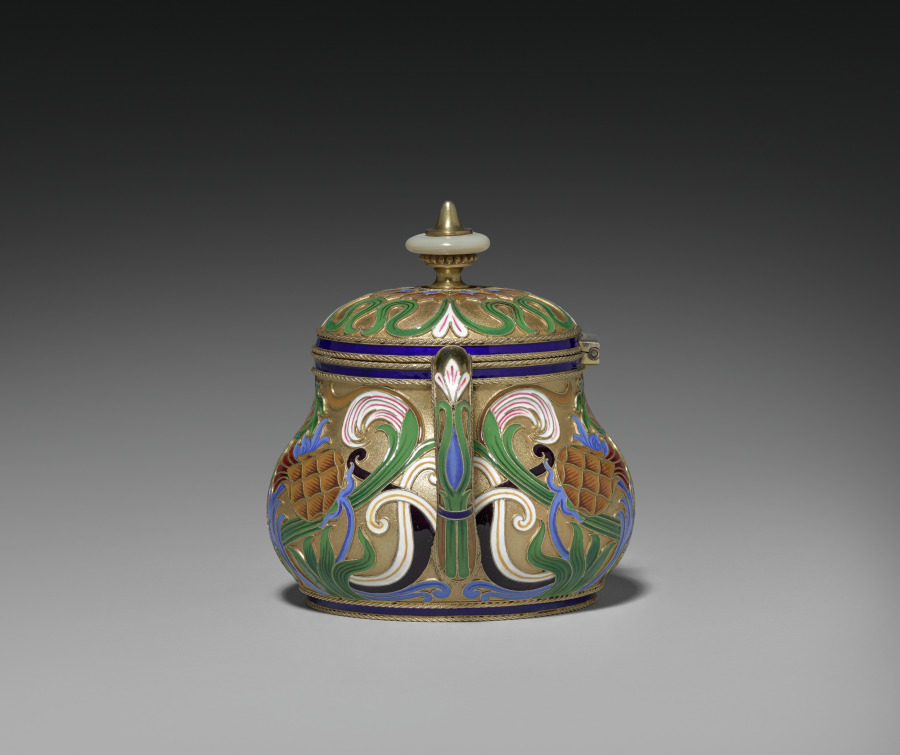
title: Covered Sugar Bowl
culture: Russia, St. Petersburg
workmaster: attributed to Feodor Ivanovich Rückert (Russian, 1840–1917)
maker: House of Fabergé (Russian, 1842–1918)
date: 1887–96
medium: silver gilt, opaque cloisonné enamel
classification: Miscellaneous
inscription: 84, St. George [assay mark for Moscow, 1882-1896]; C. Fabergé (in Cyrillic); double-headed eagle [imperial warrant]; St. George?; initials of Carl Fabergé (in Cyrillic); 10593 scratched.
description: Fabergé’s craftsmen in Moscow, especially under the watchful eye of workmaster Feodor Rückert, became known for their work in the pan-Slavic or neo-Russian style, hearkening back to 17th-century motifs of Russian folk art. Often on rather conventional shapes, Rückert and his silversmiths created an explosion of color, achieved through the historic technique of cloisonné enamel in which tiny metal lines are soldered to the surface then filled with glass powders in various colors and fired to create a high gloss finish. The result is a spectacular evocation of the 17th-century originals. Far from mere copies, however, Rückert's designs, such as this tea service, employ naturalistic or abstract motifs in a thoroughly modern adaptation of a remarkable earlier period of Russian art and decoration.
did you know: This covered sugar bowl is part of a larger tea service.